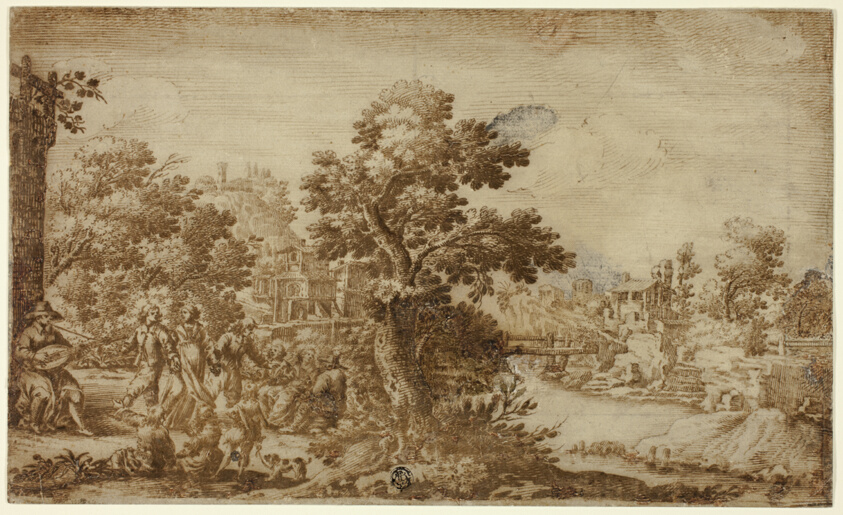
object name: Drawing and Watercolor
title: Landscape with Dancers and Musicians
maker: Attributed to Ercole Bazzicaluva; Italian, c.1610-after 1641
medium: Pen and brown ink, over traces of black chalk, on buff laid paper, laid down on ivory wove paper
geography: Italy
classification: pen and ink drawings; drawings (visual works); prints and drawing